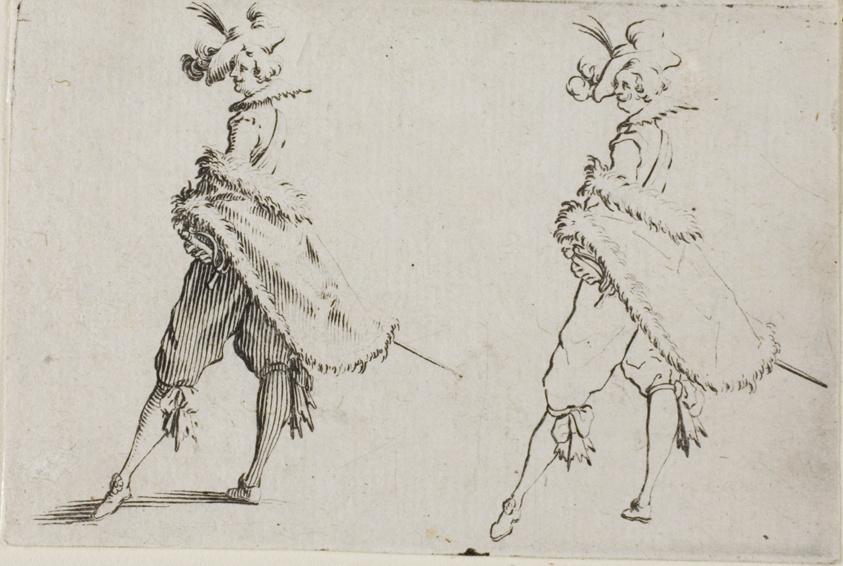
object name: Print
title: The Gentleman with a Coat, Posing with Hands on Hips, from The Caprices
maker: Jacques Callot (French, 1592-1635)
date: c. 1622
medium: Etching on ivory laid paper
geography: France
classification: etching; print; prints and drawing